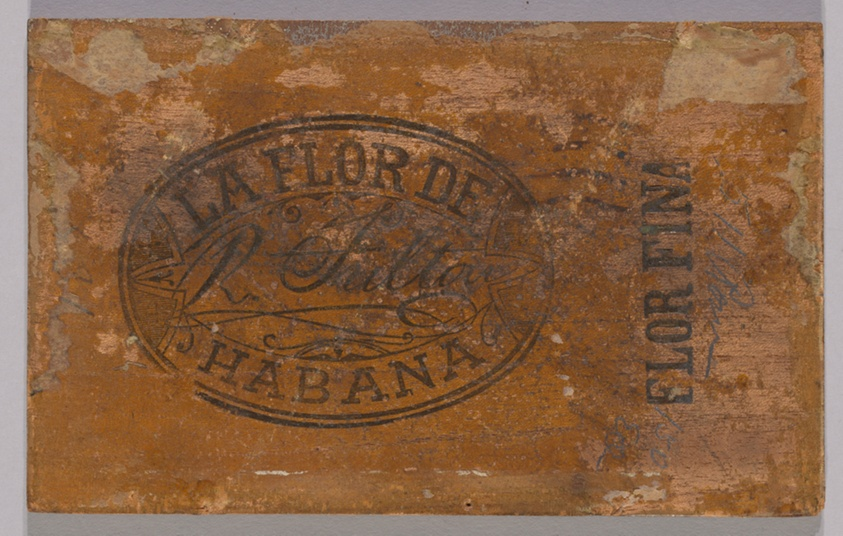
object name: Painting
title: Landscape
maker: William Keith (American, born Scotland, 1839–1911)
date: 1868-1900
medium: Oil on panel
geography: United States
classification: painting; modern and contemporary art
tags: landscape